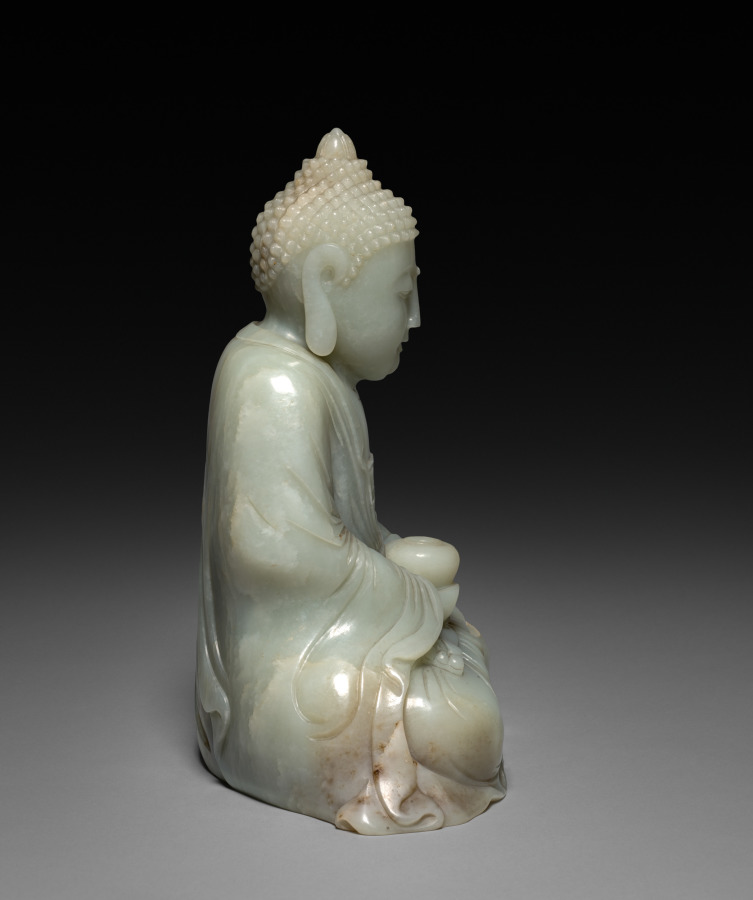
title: Seated Buddha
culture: China, Qing dynasty (1644-1911)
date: 1700s–1800s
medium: jade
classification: Jade